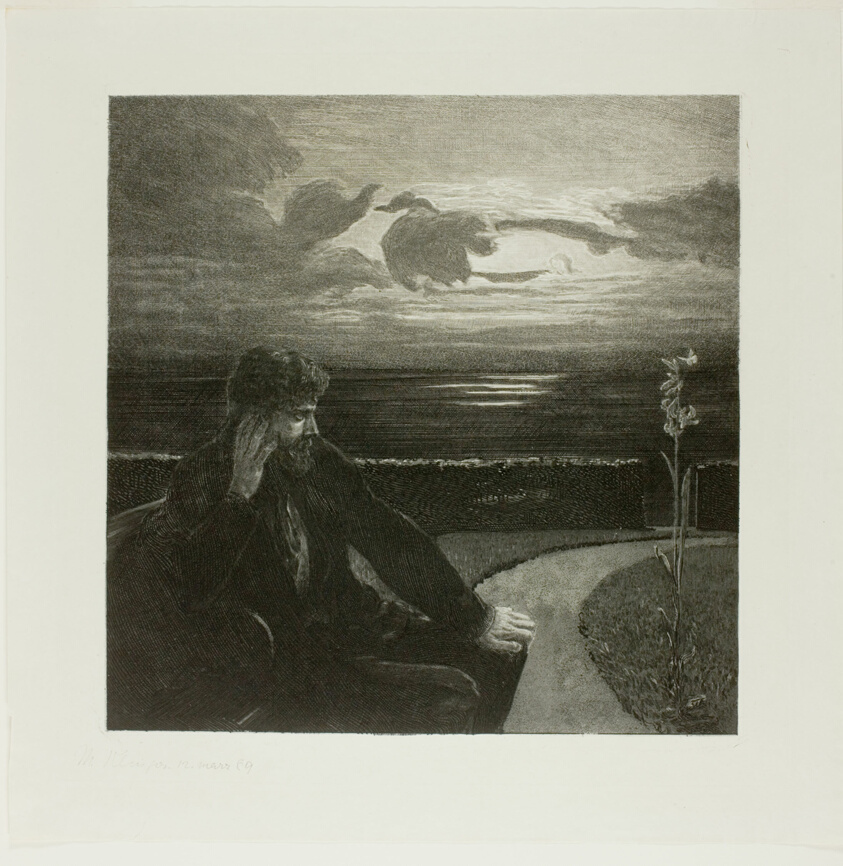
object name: Print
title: Night, from On Death Part I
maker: Max Klinger (German, 1857-1920)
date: 1888–89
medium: Etching, aquatint and burnishing in black ink on ivory wove paper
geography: Germany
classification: etching; paper; print; prints and drawing